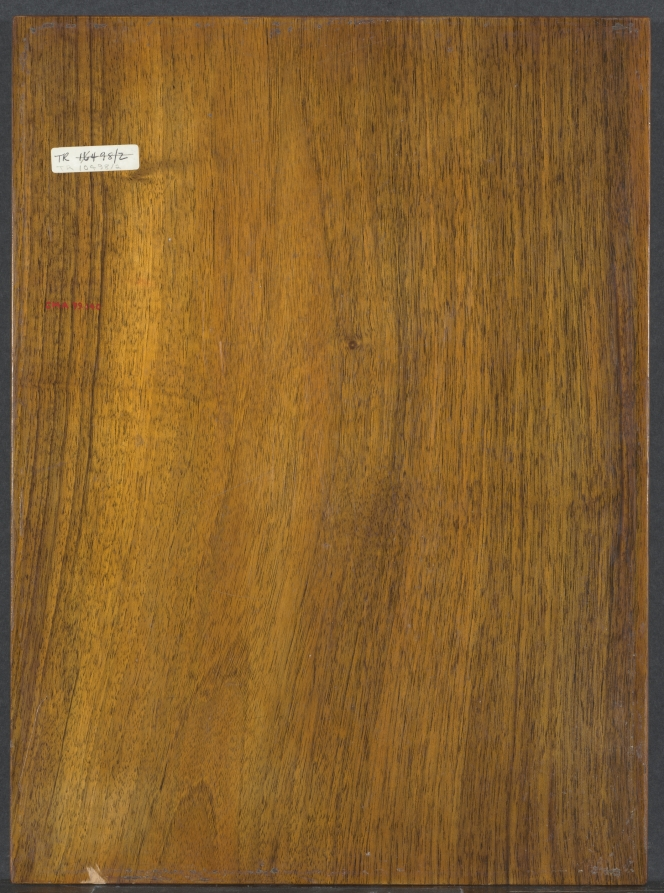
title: Virgin and Child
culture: Italy, Umbria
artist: circle of Fiorenzo di Lorenzo (Italian)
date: c. 1500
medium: tempera and gold on wood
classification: Painting